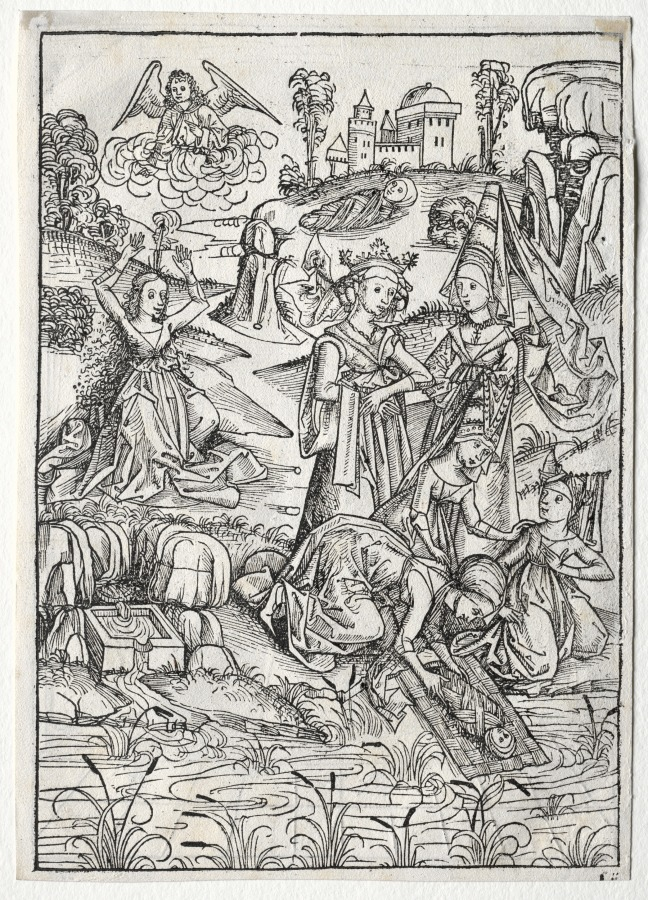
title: Der Schatzbehalter: Moses Found by Pharaoh's Daughter (recto); Der Schatzbehalter: Christ before Caiaphas (verso)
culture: Germany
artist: Michael Wolgemut (German, 1434–1519)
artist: Wilhelm Pleydenwurff (German, 1450–1494)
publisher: Anton Koberger (German, 1435-1513)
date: 1491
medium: woodcut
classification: Print